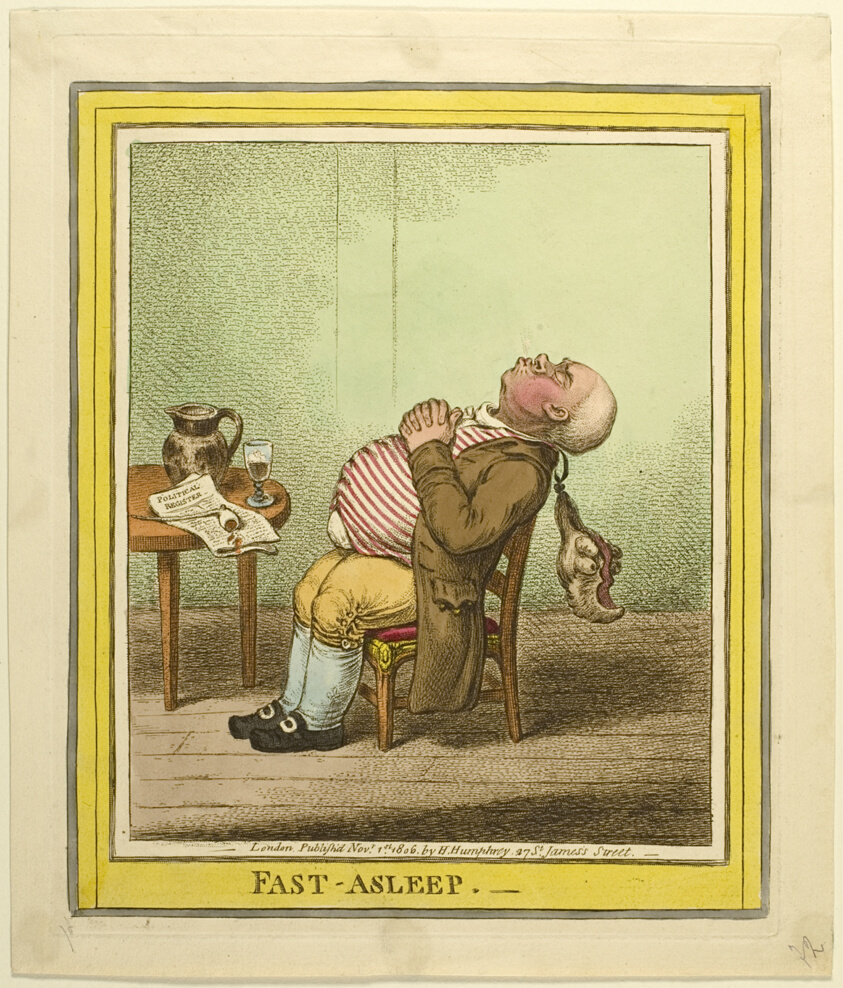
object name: Print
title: Fast Asleep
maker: James Gillray (English, 1756-1815); published by Hannah Humphrey (English, c. 1745-1818)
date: published November 1, 1806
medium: Hand-colored etching on paper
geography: England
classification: etching; print; prints and drawing